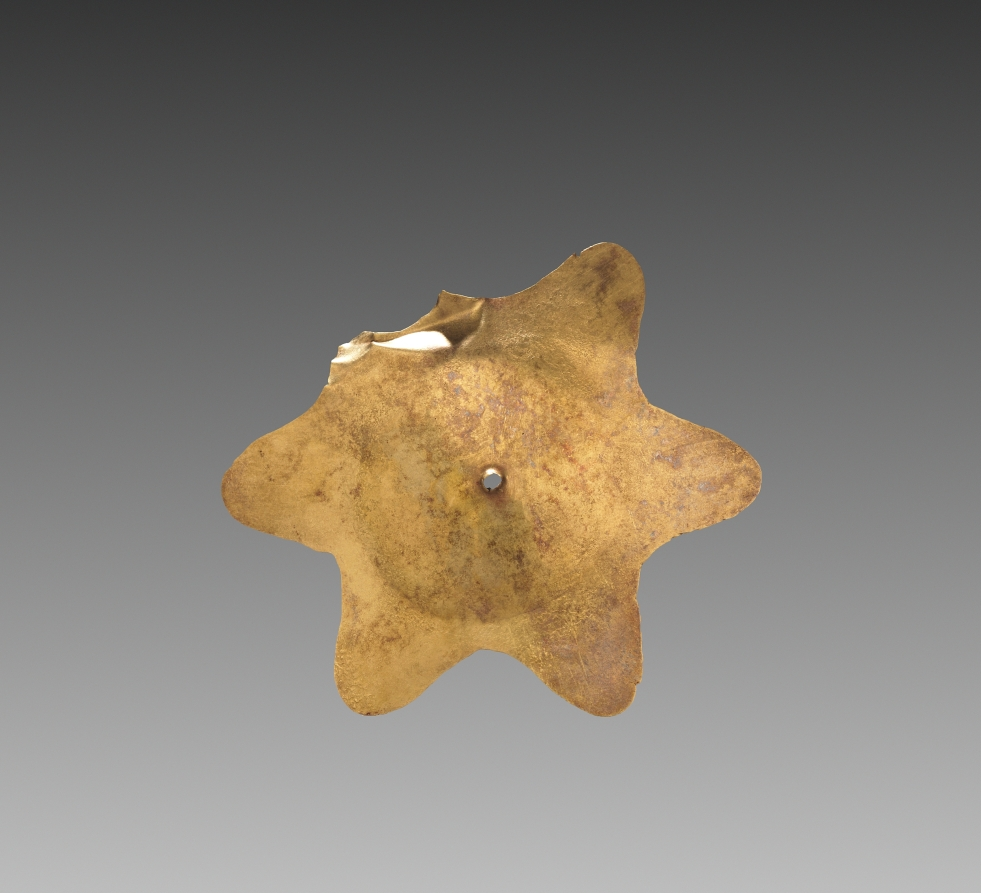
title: Headdress Ornament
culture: Peru, South Coast, Paracas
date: c. 300 BCE–200 CE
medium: hammered and embossed gold-copper alloy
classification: Jewelry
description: A similar star-shaped metal ornament is present on a human-hair wig from a mummy excavated at the Paracas Necropolis site. The wig has tresses wrapped with colored yarns, and a long headband wrapped many times around the head. The star-shaped ornament is attached to the headband, and a circular metal ornament is attached to the braid.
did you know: Tumbaga is an alloy made by blending gold with copper, which may give the gold a rosy hue.